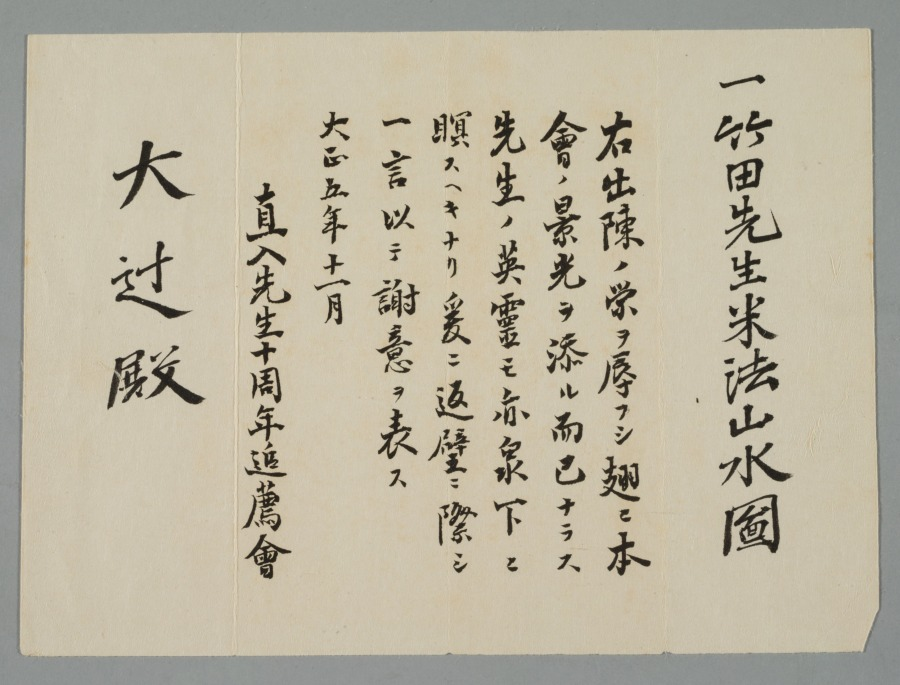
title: Mountain View and Blue Water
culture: Japan, Edo period (1615–1868)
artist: Tanomura Chikuden (Japanese, 1777–1835)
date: early 1800s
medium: hanging scroll; ink, color, and gold on paper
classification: Painting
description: Tanomura Chikuden was an eminent painter whose adopted son, Tanomura Chokunyū (1814–1907), was Seifū Yohei III’s painting teacher. This work was displayed at a gathering commemorating the 10th anniversary of Chokunyū’s death, something we know only because its custom-made box and archival documents have been carefully kept together. The box inscription also confirms that Chikuden was emulating the style of the Mi family of painters, active during China’s Southern Song dynasty (1127–1279). The painting’s Chinese-style silk wrapper is inscribed and sealed on its interior by members of Chokunyū’s community.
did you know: The mountain shapes are built up with multiple small wet strokes.